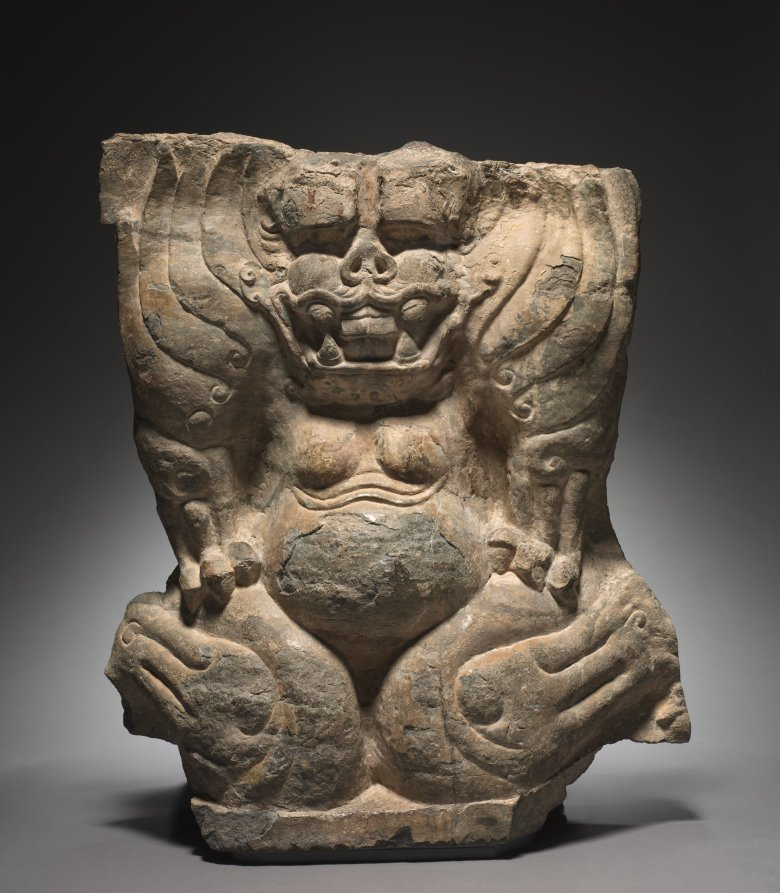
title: Kneeling Winged Monster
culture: China, Hebei province, northern Xiangtangshan caves, North cave, Northern Qi dynasty (550-577)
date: 550–77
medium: limestone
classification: Sculpture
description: This kneeling monster from the cave-temple complex at Xiangtangshan was originally placed below some wall niches on the perimeter. With its grotesque face and body, it is among the most imaginative sculptures of the period.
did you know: The hunched monster has three-fingered hands, four square teeth in center of its mouth, and two pairs of pointed teeth on either side.